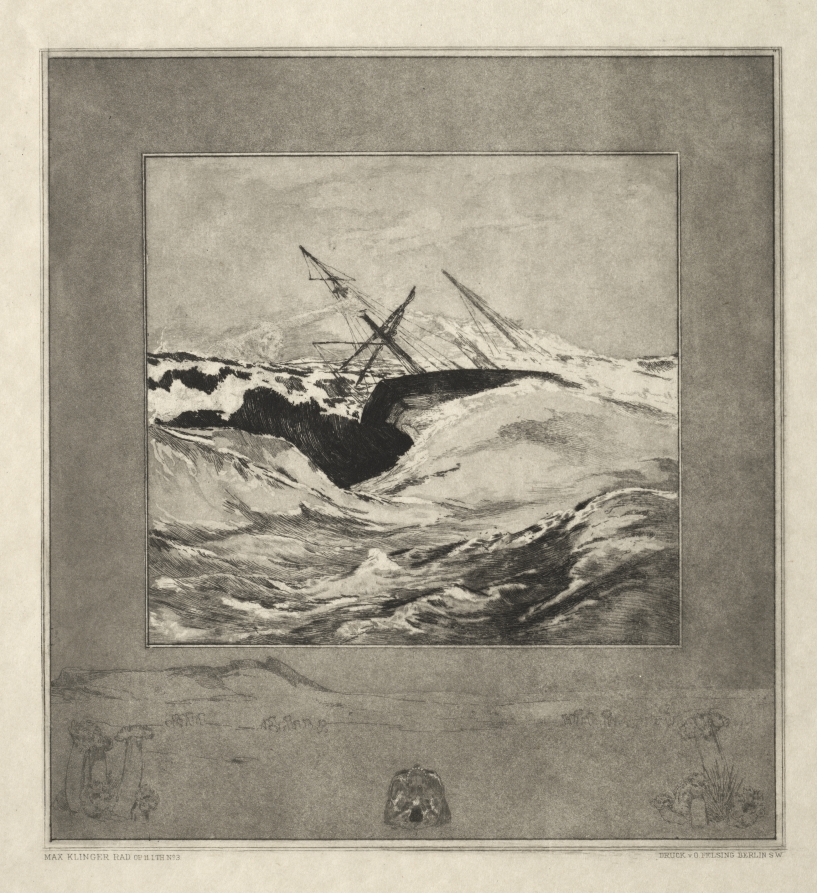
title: Vom Tode I, (Opus II, 1889) No. 3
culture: Germany, late 19th century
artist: Max Klinger (German, 1857–1920)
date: 1889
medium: etching and aquatint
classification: Print